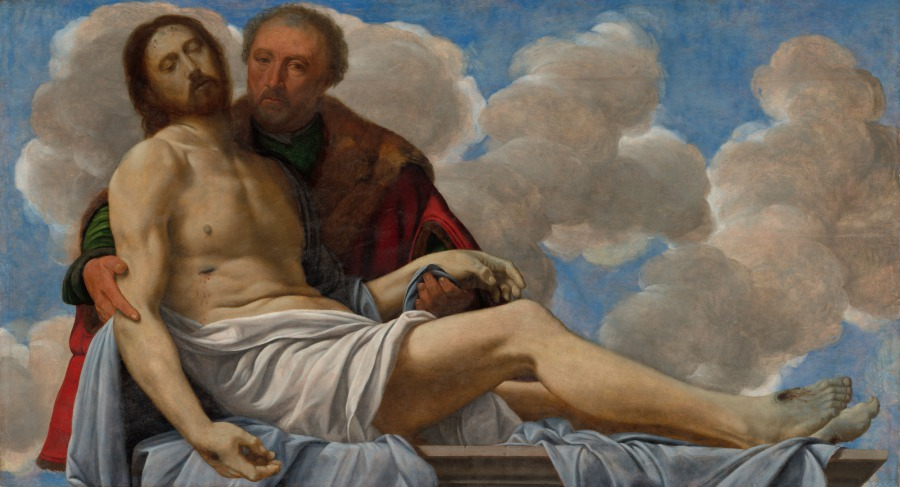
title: Christ with Joseph of Arimathea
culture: Italy, 16th century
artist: Giovanni Girolamo Savoldo (Italian, c. 1480–after 1548)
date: c. 1525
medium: oil on wood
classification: Painting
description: After the Crucifixion, Joseph of Arimathea obtained permission to bury Christ’s body in Joseph’s own tomb. Aside from an amorphous, cloudy sky, Savoldo eliminated the background entirely and reduced the narrative to two monumental figures, brought to the front of the picture plane. These qualities surely had a great impact on Caravaggio, who initially trained in Northern Italy, where Savoldo spent his career. This work originally hung over a large altarpiece, which explains the unusual perspective, the panel’s horizontal shape, and the figures’ position above the viewer.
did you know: This panel originally crowned the largest painting Savoldo ever made for a public setting.